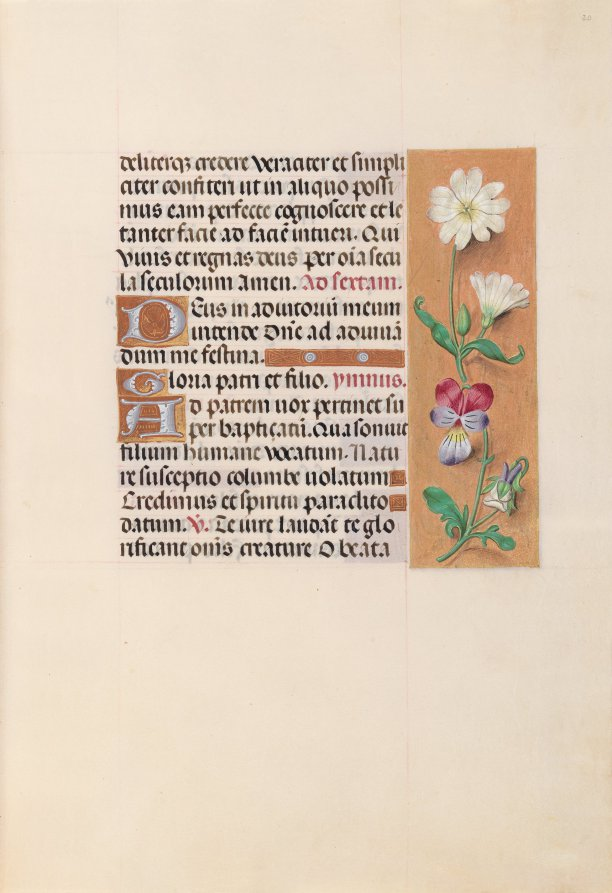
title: Hours of Queen Isabella the Catholic, Queen of Spain: Fol. 20r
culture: Flanders, Ghent and Bruges, late 15th century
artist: Master of the First Prayerbook of Maximillian (Flemish, c. 1444–1519)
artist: and Associates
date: c. 1500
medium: ink, tempera, and gold on vellum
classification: Bound Volume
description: This manuscript was illuminated by a circle of at least five highly organized manuscript painters active in the Flemish cities of Ghent and Bruges. The principal illuminator was Alexander Bening, who painted the majority of the book's miniatures. Manuscripts produced by this circle of artists are renowned for the decoration of their borders, which typically feature a rich variety of realistically-painted flowers, birds, and butterflies. This prayer book, called a book of hours, was intended not for a cleric, but for the private devotions of a lay person-in this case, Isabella the Catholic, Queen of Spain (1451-1504). Isabella's coat of arms embellishes the book's frontispiece. It is unlikely that the book was commissioned by the Queen herself; rather, she probably received it as a diplomatic gift from someone courting her patronage, perhaps Cardinal Francisco Jimenez de Cisneros. A Franciscan friar, Jimenez was dependent upon Isabella for his advancement, first to the post of Queen's confessor in 1492, and then to Archbishop of Toledo in 1495.